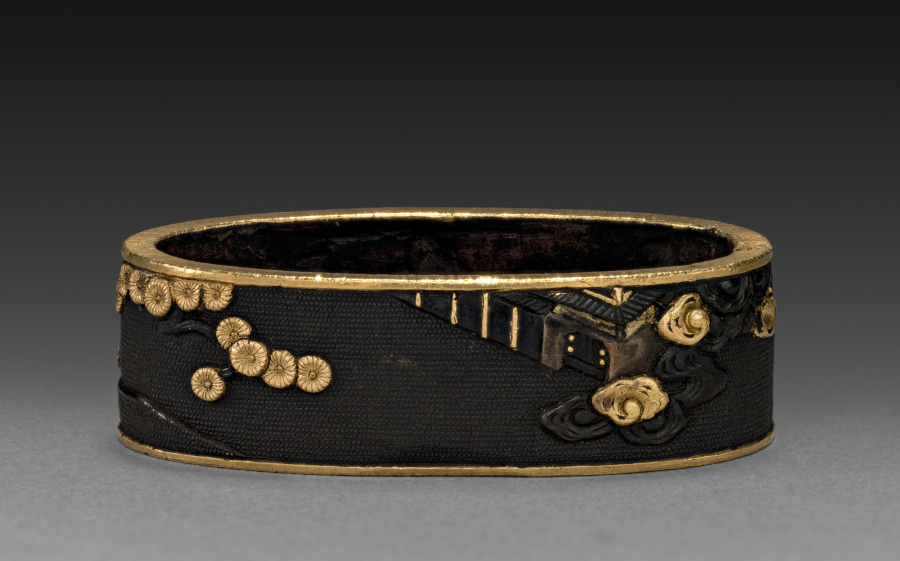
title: Sword-Hilt Collar (Fuchi)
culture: Japan, Edo period (1615–1868)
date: 1700–1850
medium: shakudo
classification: Arms and Armor